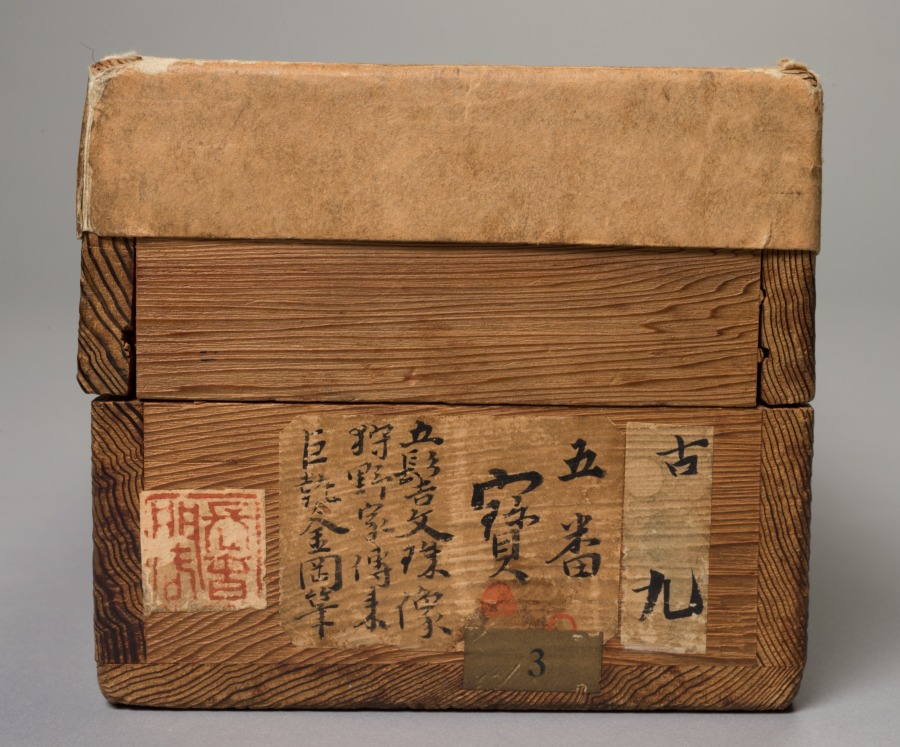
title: Monju with Five Hair Knots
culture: Japan, Kamakura period (1185–1333)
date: late 1200s–early 1300s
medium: Hanging scroll; ink, color, gold, and cut gold on silk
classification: Painting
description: This Buddhist painting shows Monju, Manjushri in Sanskrit, riding a lion. Monju is a bodhisattva, a being who, though enlightened, chooses not to become a Buddha but instead helps others achieve enlightenment. Monju’s youthfulness symbolizes his pure wisdom, unsullied by the world, and his five hair knots represent his vow to keep calamity at bay. The supernatural nature of his lion is emphasized by its hair, every strand painted in gold, as well as by the lotus platforms beneath each of its feet. The boy’s bejeweled body and silk finery is meant to resemble that of an Indian prince.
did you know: This painting is exemplary of the Kamakura period, known for artworks with special attention paid to the realism of images.